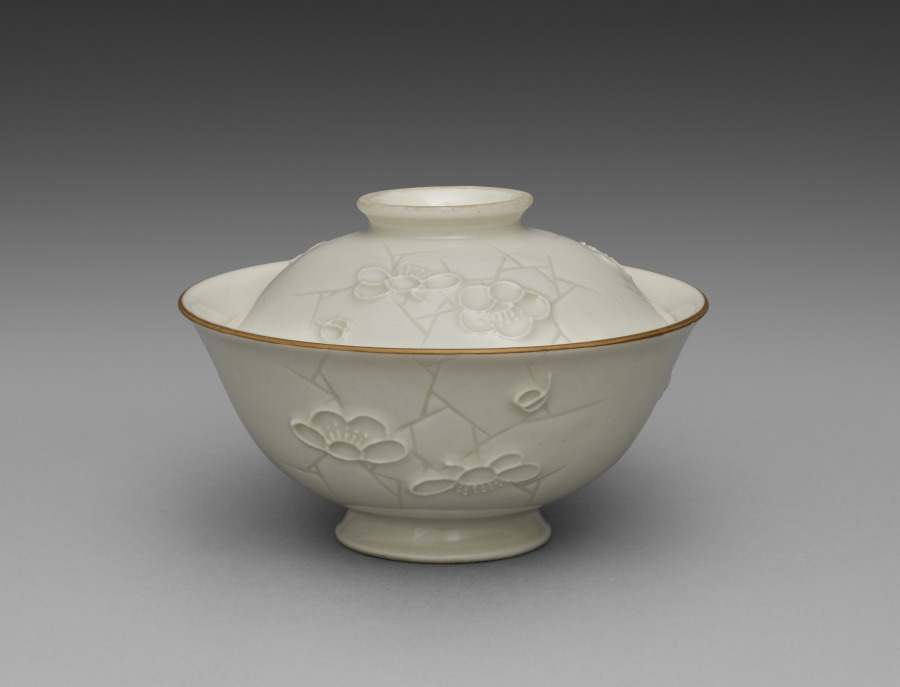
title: Covered Bowl from Dining Set with Plum Blossoms and Cracked-Ice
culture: Japan, Meiji period (1868–1912)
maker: Seifū Yohei II (Japanese, 1844–1878)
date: c. 1875–78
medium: Porcelain with molded designs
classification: Ceramic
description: Each item in this set has a delicate low-relief design of flowering plum branches over scattered, intersecting lines meant to resemble the cracked-ice surface of a frozen body of water and is signed on the base in gold pigment. While Yohei II produced many fine works in underglaze blue, like those produced by Kiyomizu Shichibei, he also made works in quite different styles later in his career, from the early 1870 s. In 1873, he was appointed purveyor to the Industrial Center of Kyoto Prefecture, a designation associated with Kyoto’s efforts to reach an international market through the port of Kobe; and from 1875 until his death, he was involved in national-level projects to present Japanese ceramics across the world. It was during this period that Yohei III was apprenticed to Yohei II, and it has been suggested that this set may in fact be an early example of Yohei III’s work, which he signed with his teacher’s name. Decorated with flowers resembling Japanese textile motifs, the set calls to mind the design of Yohei II’s pair of vases with plum blossoms in the Victoria and Albert Museum. Here, the elaborate trees created for a formal public exhibition setting have been translated into the approachable blossoms of the genteel domestic environment. While the designs are consistent across the pieces, each raised flower petal and pistil and each incised line in the ice was done by hand, so the cups, bowls, and dishes are similar yet unique. The bottoms of two boxes once identified the set’s owner, but the information has been deliberately obscured with black ink. However, inscriptions still visible appear to indicate two occasions, once at the end of July 1886 , and once again in June 1916 , when parts of the set were requested from Hokura in Niigata Prefecture. The location corresponds to a neighborhood in the present-day city of Jōetsu. The surname Tsuji 辻 also appears on a paper tag affixed to one of the box cloths. Future research may possibly reveal more about their provenance. A vase by Yohei III in a private collection combines the formal grandeur of the Yohei II vases in the Victoria and Albert Museum with the gentler design of this dining set, placing flowering plum trees against soft, scalloped-edge clouds resembling those in golden screens.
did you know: The dining wares have a creamy white coloration that the four boxes containing them identify as Korean in style.